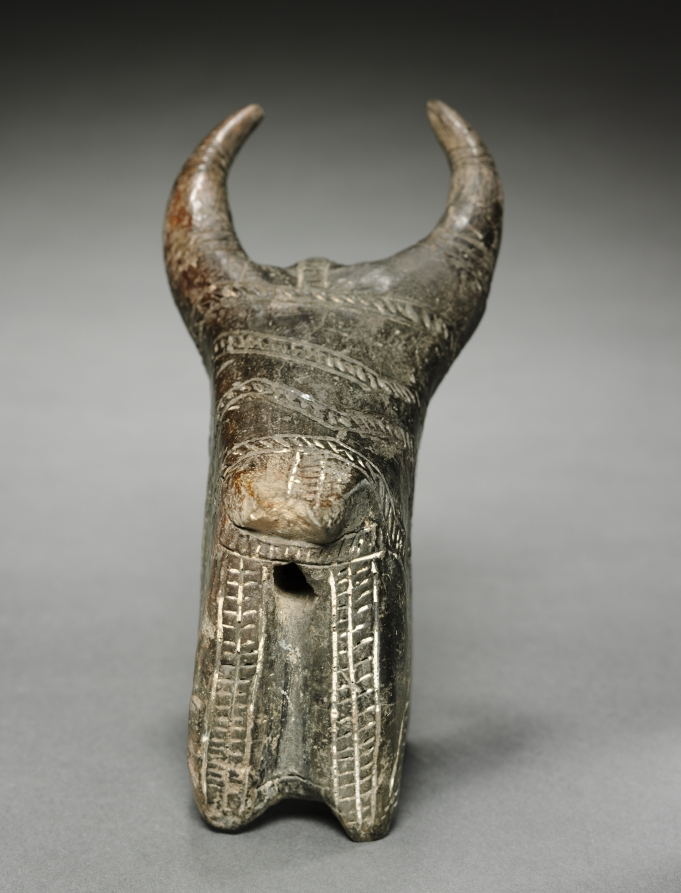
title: Bull Protome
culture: Cyprus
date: 2000–1000 BCE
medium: terracotta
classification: Ceramic